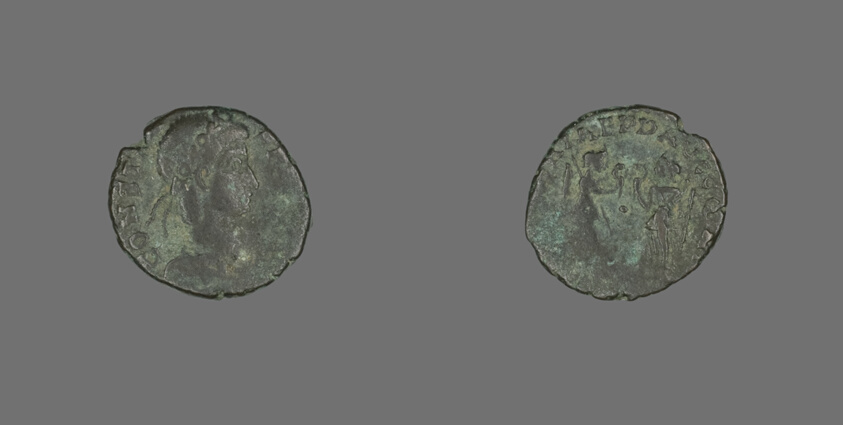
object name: Coin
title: Coin Portraying Emperor Constans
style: roman (ancient, style or period), ancient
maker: Roman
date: 335-350 CE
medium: Bronze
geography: Roman Empire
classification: coin; ancient art